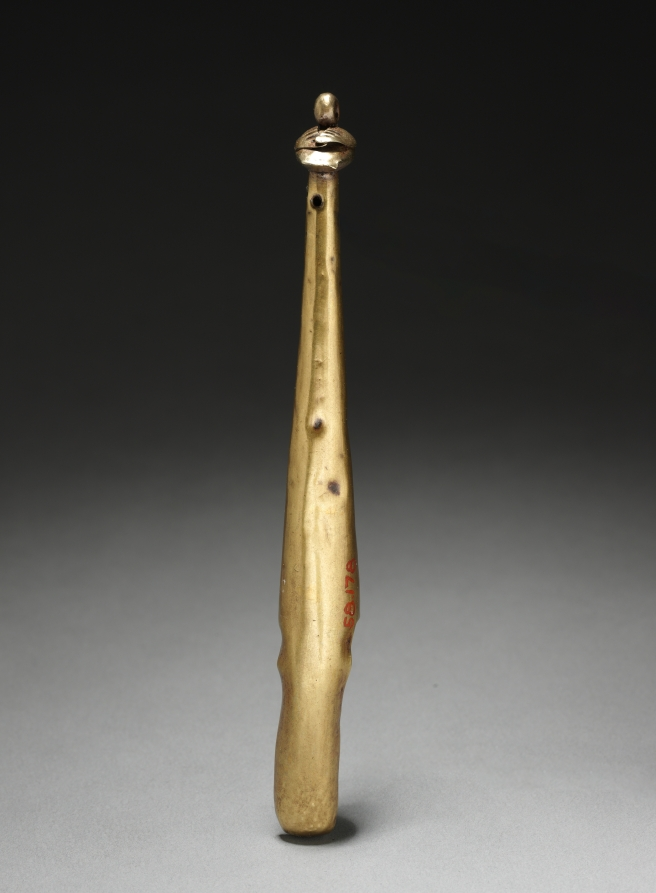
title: Spoon with Bird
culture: Peru, North Highlands, Chavín de Huantar(?), Chavín style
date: c. 500–200 BCE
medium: hammered and cut gold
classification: Metalwork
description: There seems to be a link between Chavín religion and appearance of the Andes’ first large precious-metal objects, made using revolutionary new metallurgical processes. Chavín may have developed these technical innovations to express the inexpressible, the "wholly other" nature of its religion. In many areas, elite men and women wore the ornaments as emblems of their ties to this religion, and eventually were buried with them. These 16 objects, along with three others not in the museum’s collection, are said to have come as a group from Chavín itself.